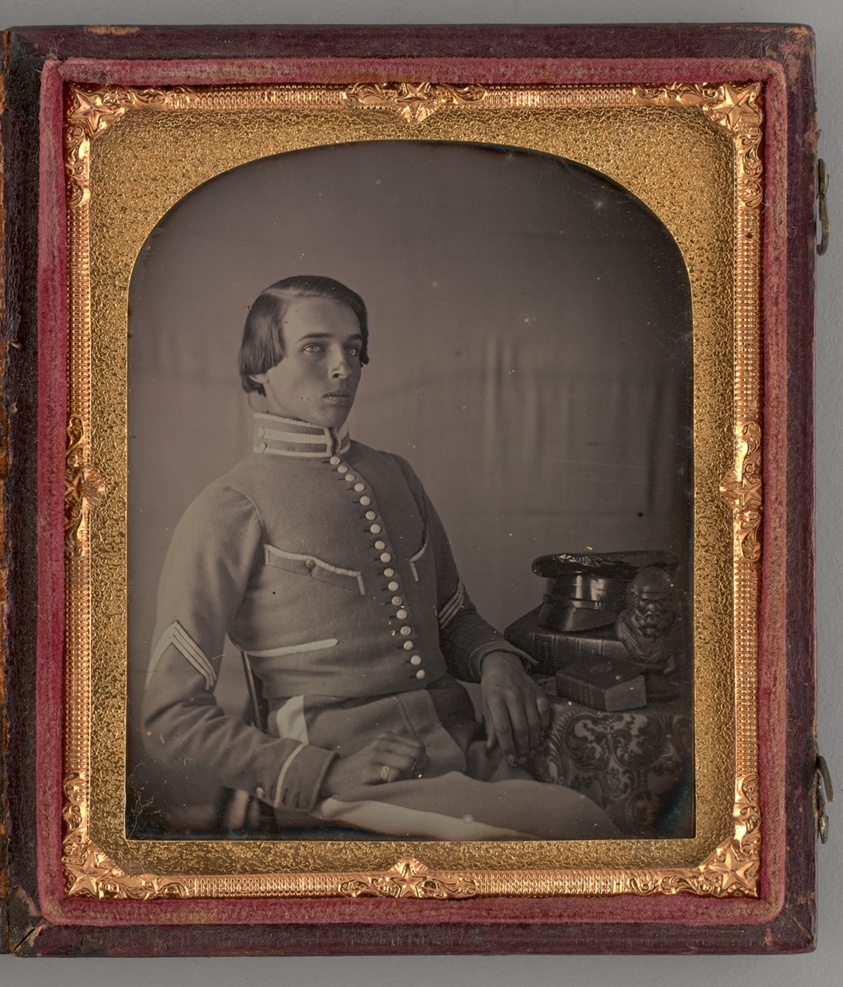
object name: Photograph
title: Untitled (Portrait of a Seated Man)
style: 19th century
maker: Unknown maker; American, 19th century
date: 1852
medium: Daguerreotype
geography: United States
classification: portrait; daguerreotype; portrait; photograph; photographic process; photography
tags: lundberg collection, Male, photography, portrait, portraits, portraits: male subject